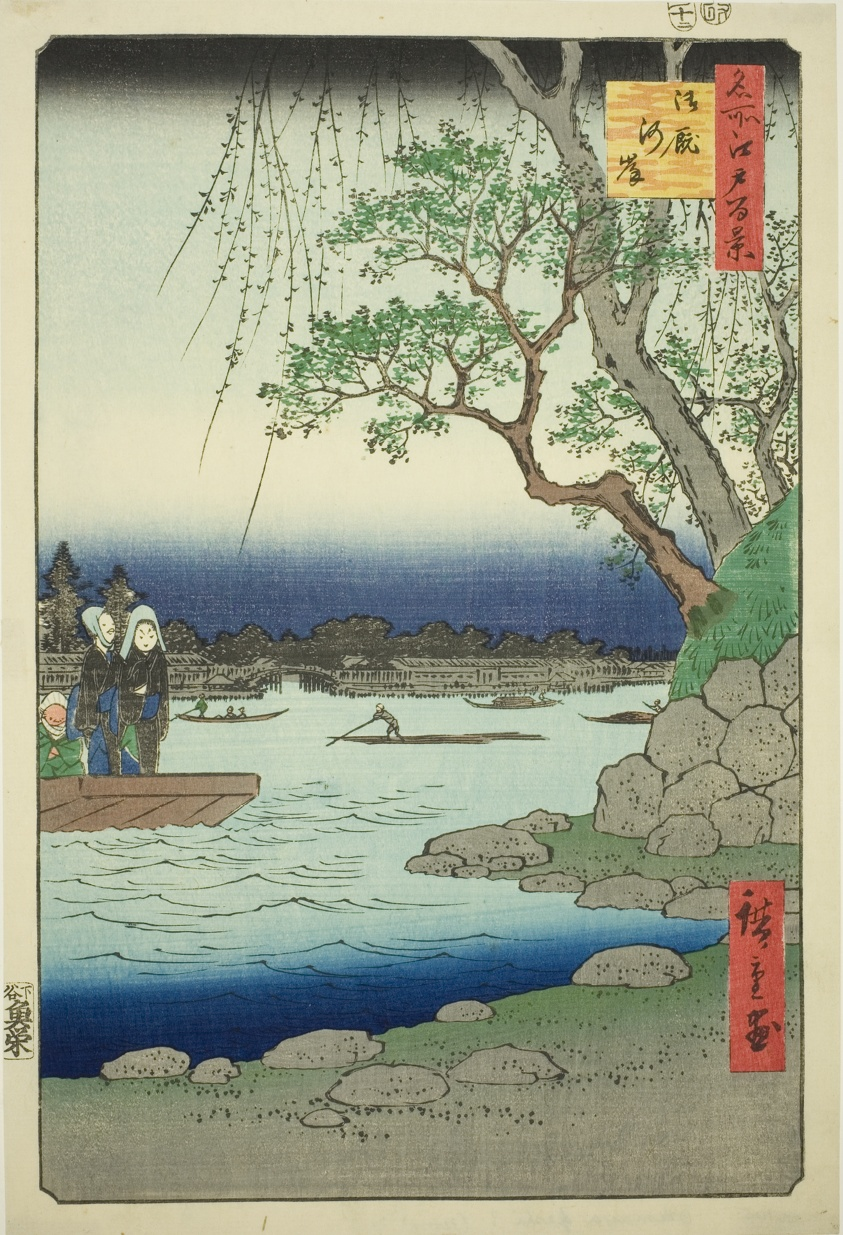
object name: Print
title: Oumayagashi, from the series "One Hundred Famous Views of Edo (Meisho Edo hyakkei)"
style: Japanese (culture or style)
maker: Utagawa Hiroshige 歌川 広重; Japanese, 1797-1858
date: 1857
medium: Color woodblock print; oban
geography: Japan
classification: woodblock print; print; asian art